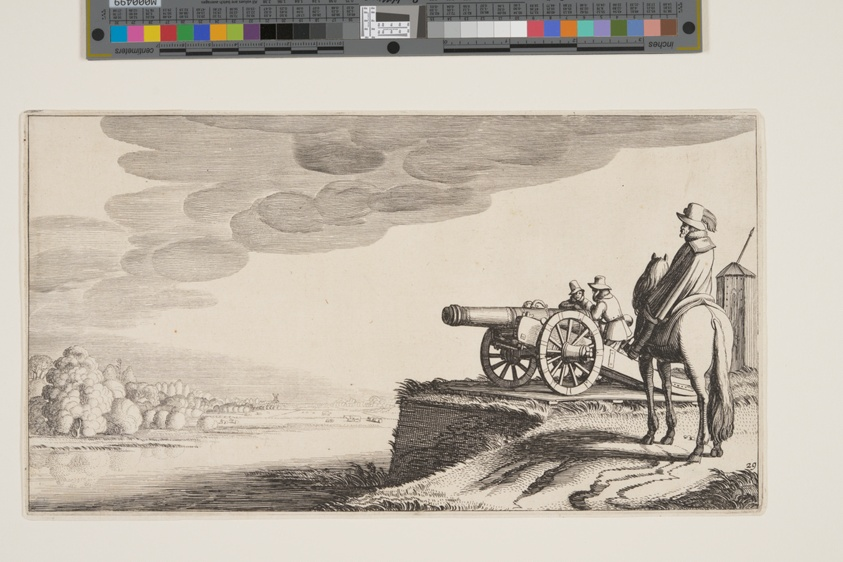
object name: Print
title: Watch-Tower on a River, from Landscapes (Playsante Lantschappen)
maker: Attributed to Claes Jansz. Visscher II (Dutch, 1586-1652); after Jan van de Velde II (Dutch, c. 1593-1641)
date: c. 1641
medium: Etching, with engraving, on ivory laid paper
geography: Netherlands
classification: etching; paper; print; prints and drawing